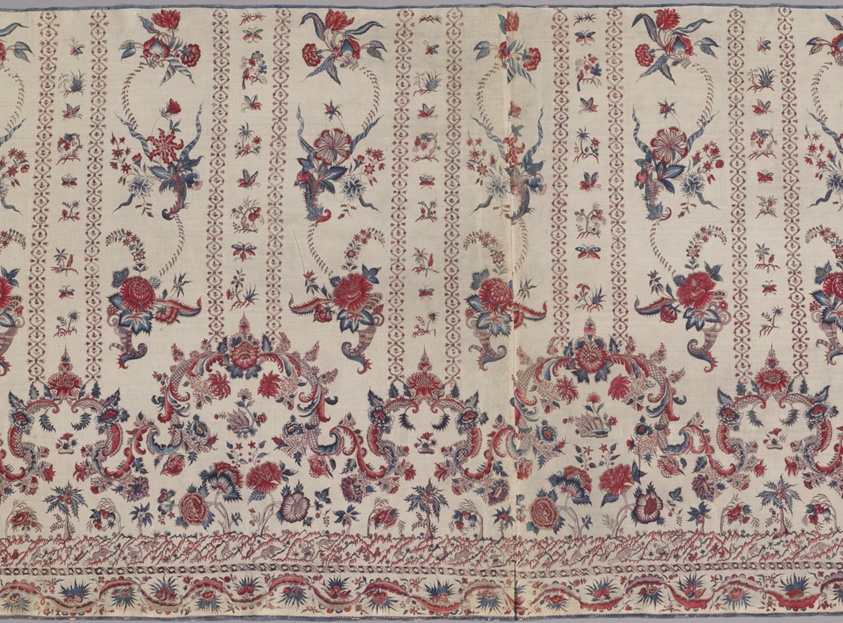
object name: Textile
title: Panel of Chintz for a Woman's Skirt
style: 18th Century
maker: Made in India possibly for the Dutch or Latin American market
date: 1730-50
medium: Cotton, plain weave; hand painted and dyed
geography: India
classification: textile; weaving - printed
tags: paisley, hunter, animals, floral, floral motifs, floral patterns, flowers, scrolls (motifs)